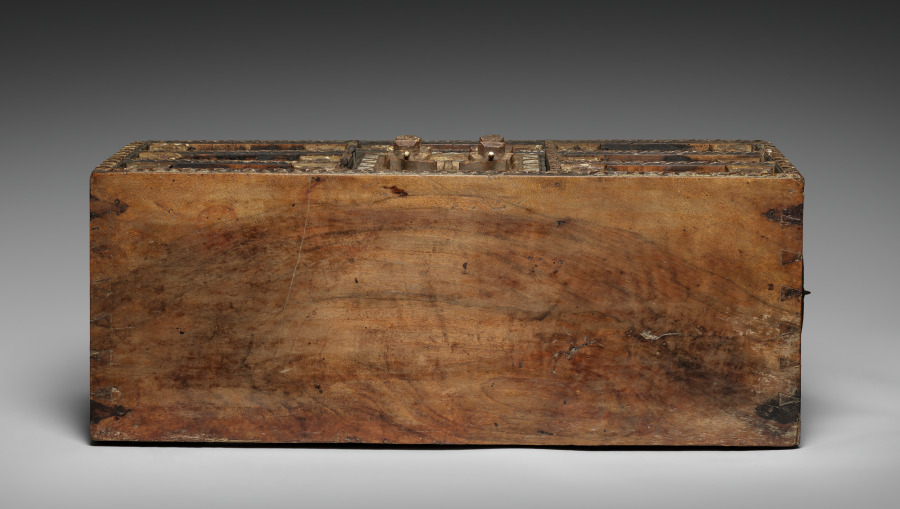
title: Chest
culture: Spain, Colonial, late 17th Century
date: late 1600s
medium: turned and joined wood, gilded and painted red with applied bone columns and bone inlays, wrought iron hardward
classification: Furniture and woodwork